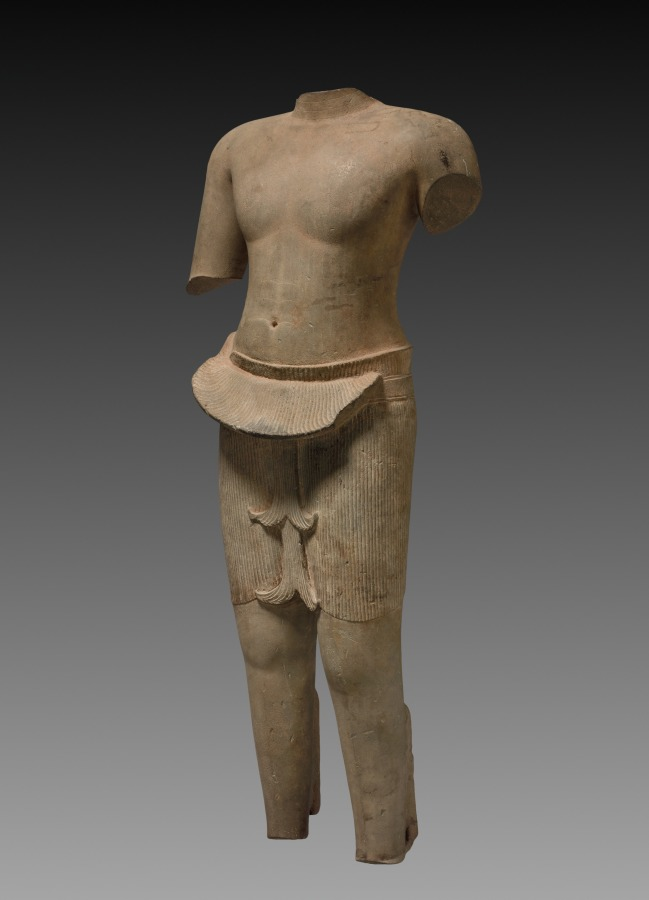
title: Male Deity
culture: Cambodia, Koh Ker-Khleong style, 10th century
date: 925–50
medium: sandstone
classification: Sculpture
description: The distinctive swath of pleated cloth and the anchor-shaped ends of the lower garment suggest that this sculpture was made when this method of wrapping the sampot was fashionable. During that time, Cambodian temples were dedicated to Hindu deities, whose images were dramatically installed alone on a pedestal in a temple's sanctum. When consecrated, gold tokens were installed under the pedestal; many sculptures were broken when people toppled them to get the gold.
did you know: This male deity seems to be striding with his left leg advanced subtly forward.